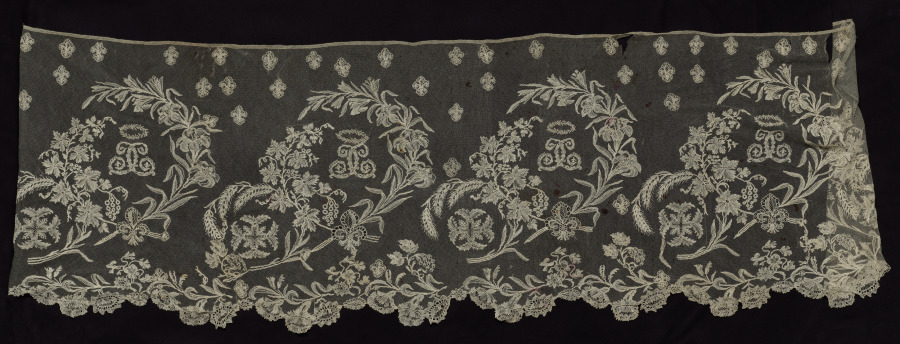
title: Lace Flounce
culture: Belgium, Brussels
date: 1811–99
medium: Machine-made net lace ground with needle lace (point a l'aiguille) appliqué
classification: Lace